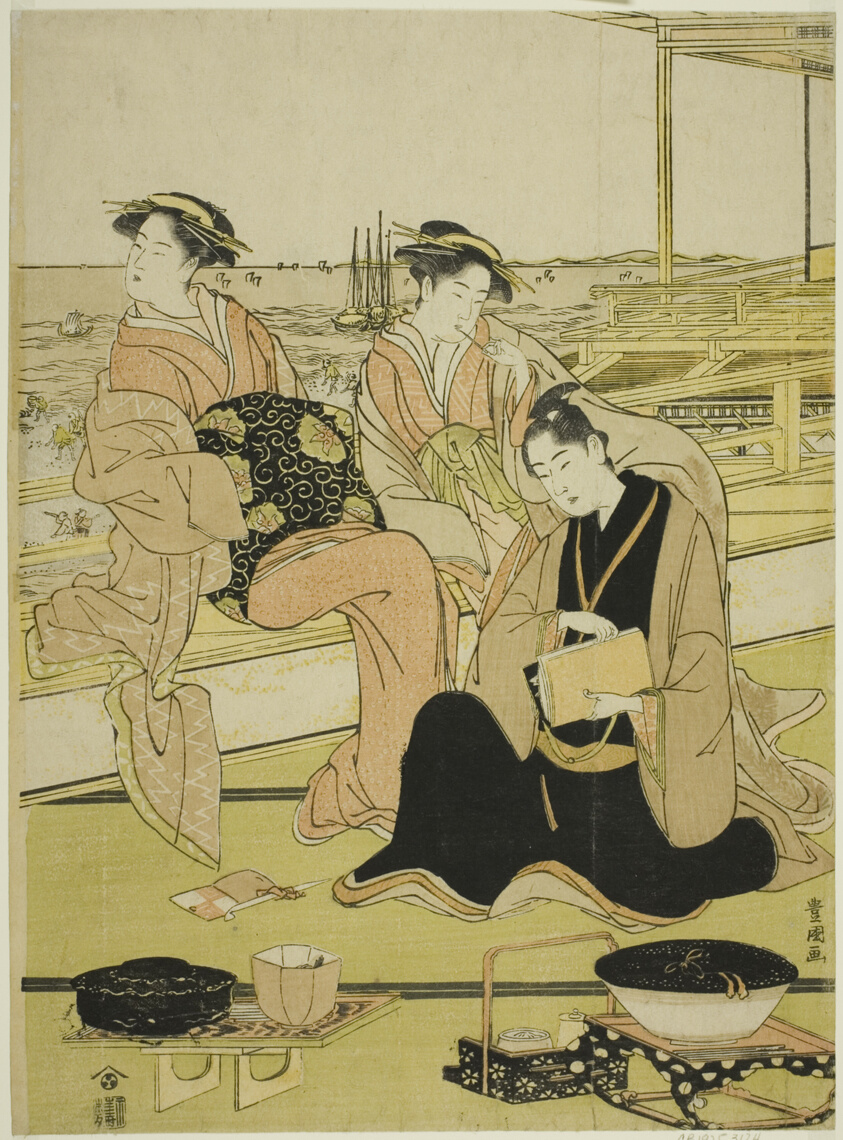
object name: Print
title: Overlooking the bay at Shinagawa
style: Japanese (culture or style)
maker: Utagawa Toyokuni I 初代 歌川 豊国; Japanese, 1769–1825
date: c. 1790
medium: Color woodblock print; sheet from an oban triptych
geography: Japan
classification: woodblock print; print; asian art